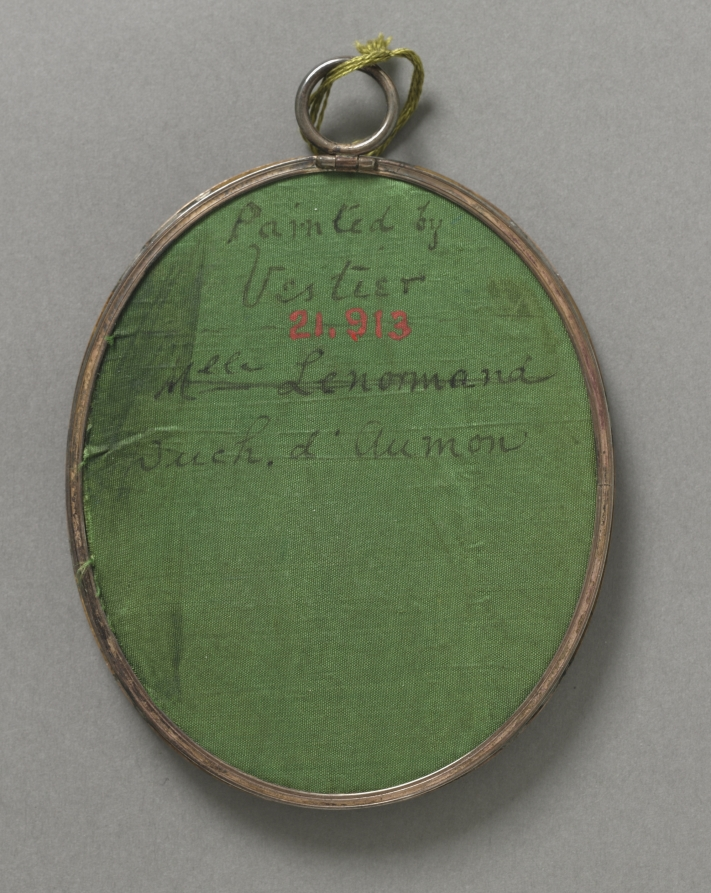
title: Portrait of a Woman with a Guitar, called Louise D'Aumont, Mazarin, Duchesse d'Aumont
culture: France, 18th century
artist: Antoine Vestier (French, 1740–1824)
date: late 18th century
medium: watercolor on ivory in gold mount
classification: Portrait Miniature